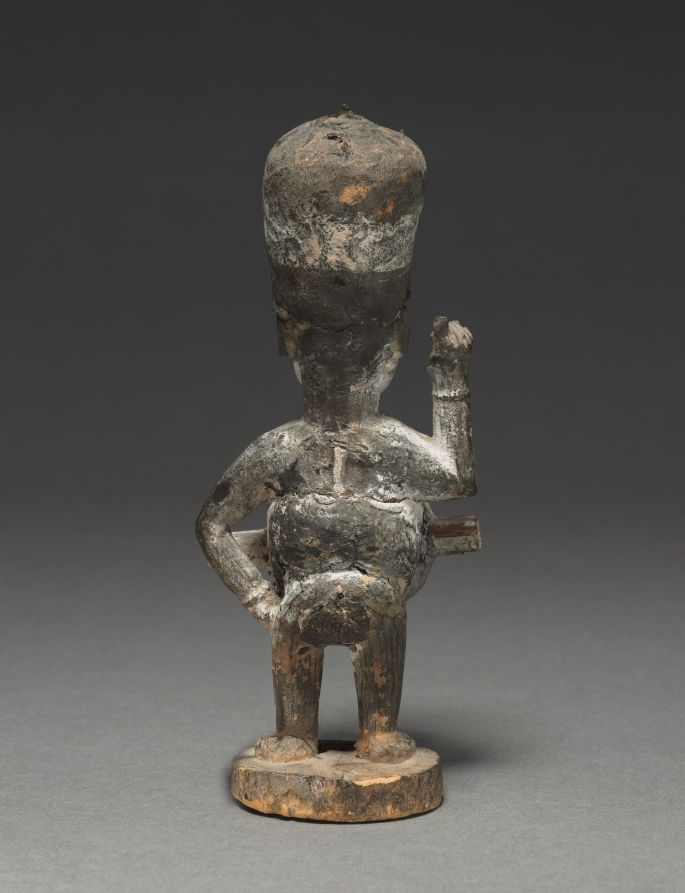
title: Power figure (nkisi)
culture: Central Africa, Republic of the Congo, Kongo people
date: late 1800s-early 1900s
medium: Wood, organic materials (including resin), probably kaolin, and metalized glass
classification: Sculpture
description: This figure is of the nduda type, characterized by the attached "guns" loaded with gunpowder and used to shoot witches. It is the only figure that adopts the threatening pose: the right hand raised, holding a spear or knife, and the left hand resting on the hip. Two guns protrude horizontally on both sides of the cylindrical medicine pack on the belly, covered with a round piece of mirror.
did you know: This is the only figure in a group of seven found in a French antique shop adopting a threatening pose.